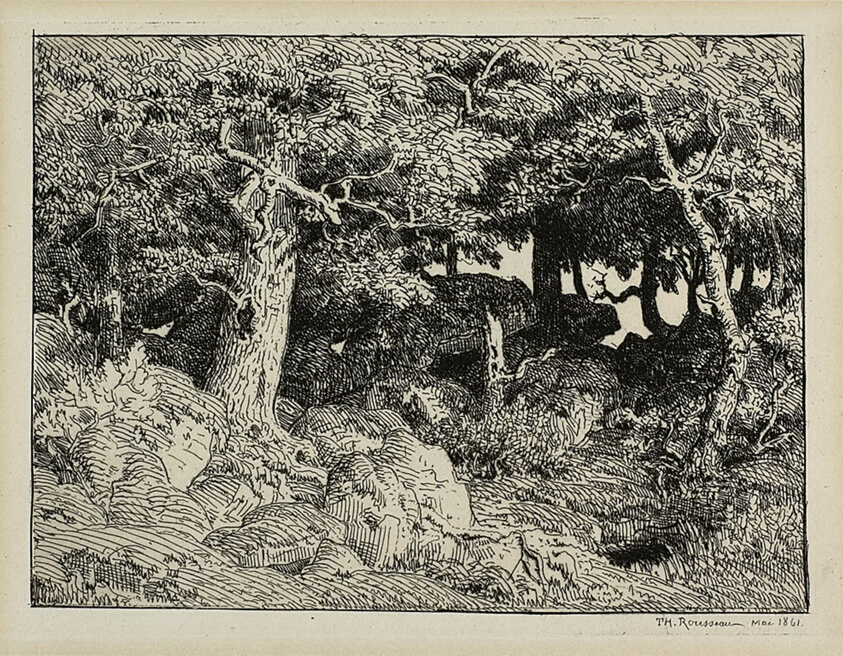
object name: Print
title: Oak from Rocks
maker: Théodore Rousseau (French, 1812-1867); printed by Auguste Delâtre (French, 1822-1907)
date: 1861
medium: Etching on ivory laid paper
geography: France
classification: etching; print; prints and drawing